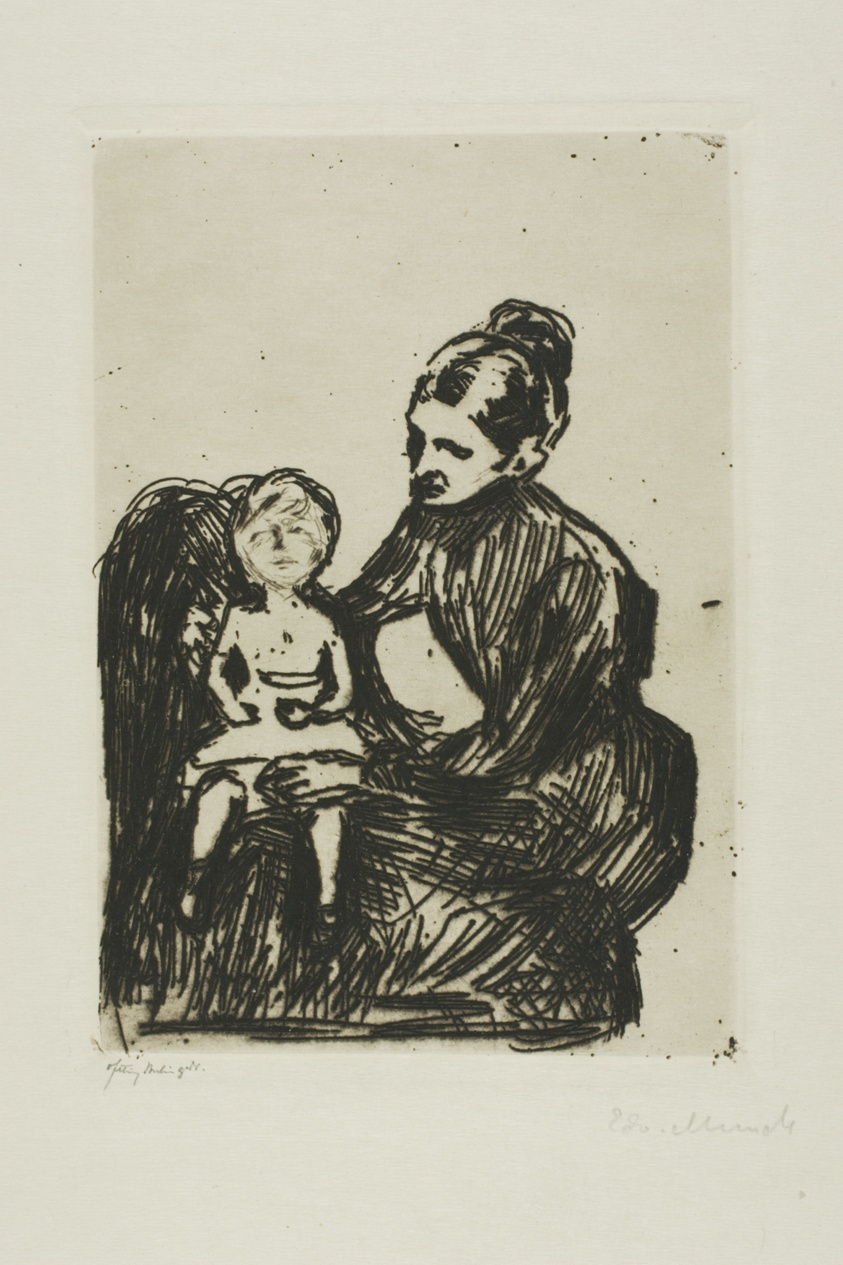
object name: Print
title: Nurse with a Boy/The Mother and the Crying Child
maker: Edvard Munch (Norwegian, 1863-1944)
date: 1902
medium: Etching and drypoint on cream wove paper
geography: Norway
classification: etching; print; prints and drawing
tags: mothers, children